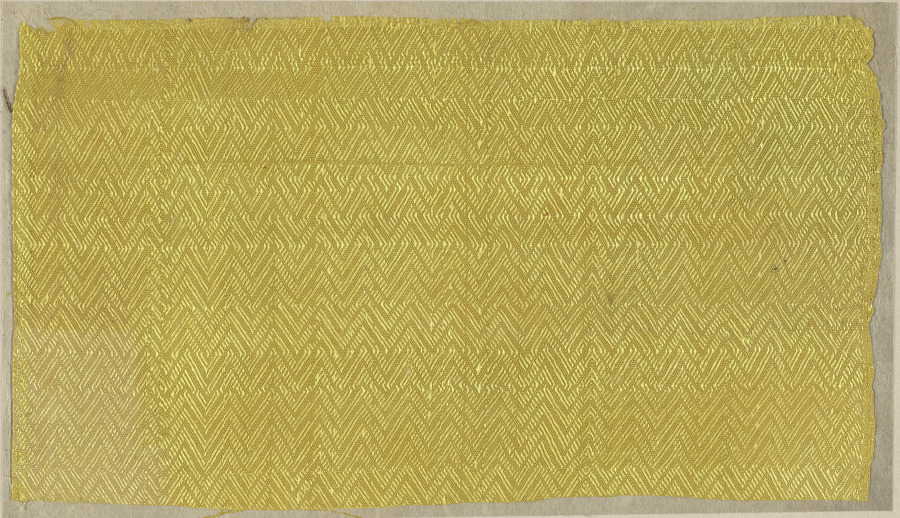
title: Fragment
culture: China, 8th century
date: 700s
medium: tabby ground and twill pattern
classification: Textile